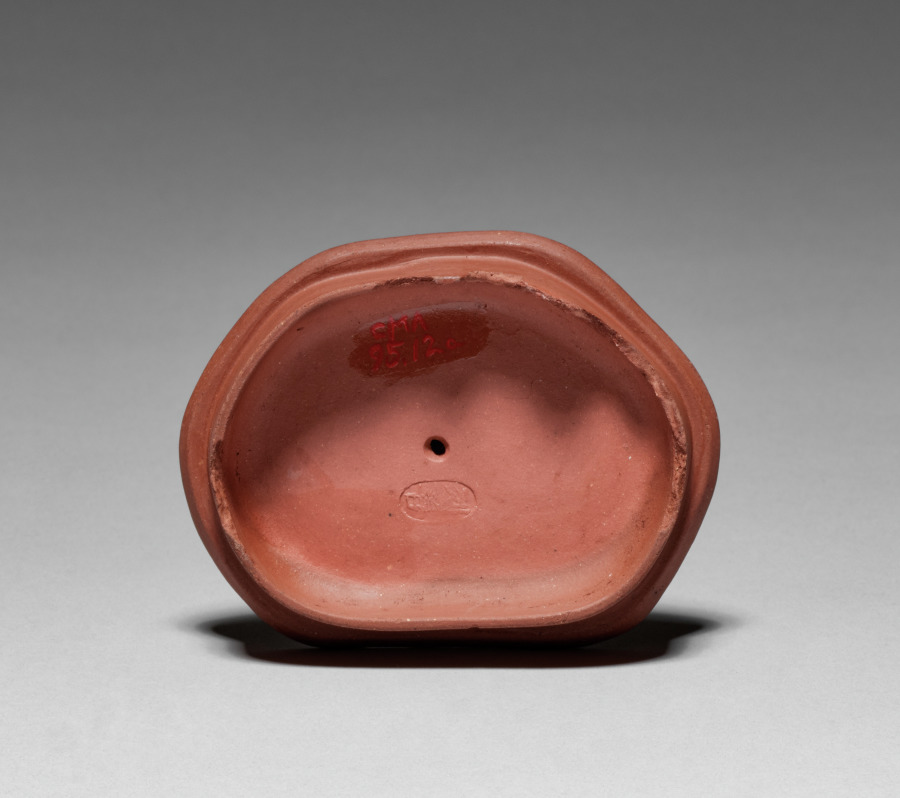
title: Yixing Teapot (lid)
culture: China, Qing dynasty (1644-1911)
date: 1800s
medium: stoneware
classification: Ceramic